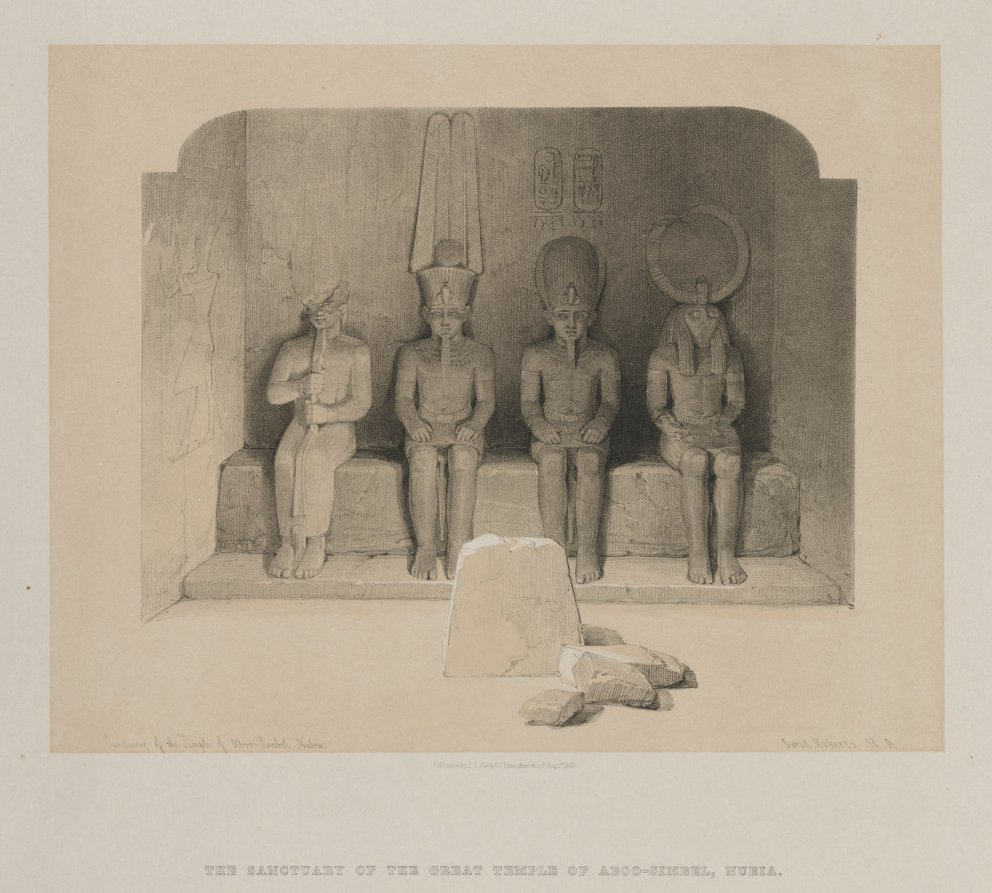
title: Egypt and Nubia, Volume I: Sanctuary of the Temple of Aboo-Simbel, Nubia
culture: England, 19th century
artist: Louis Haghe (British, 1806–1885)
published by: F. G. Moon, 20 Threadneedle Street, London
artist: after David Roberts (Scottish, 1796–1864)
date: 1846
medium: color lithograph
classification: Print